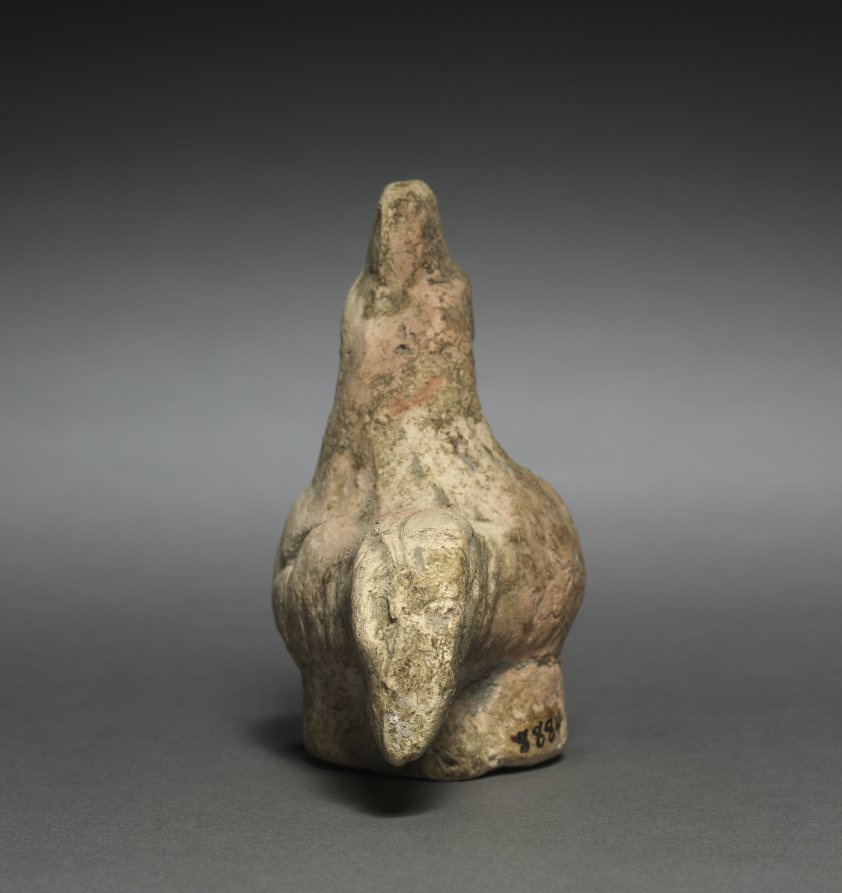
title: Figurine - Rooster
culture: Parthian Empire (247 BCE–224 CE)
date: 1–200 CE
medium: terracotta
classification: Sculpture